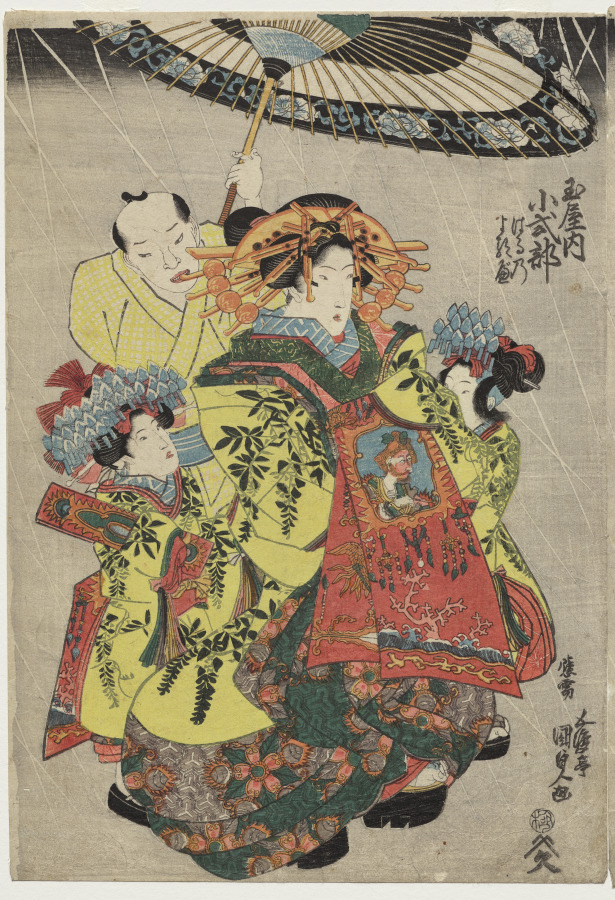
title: The Courtesans Hanamurasaki and Koshikibu of the Tamaya Promenading in the Rain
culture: Japan, Edo period (1615–1868)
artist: Utagawa Kunisada (Japanese, 1786–1865)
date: c. early 1830s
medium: color woodblock print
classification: Print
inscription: Artist's signature: Gototei Kunisada ga.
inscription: Publisher: Yamamotoya Heikichi (emblem). Censorship seal: kiwame.